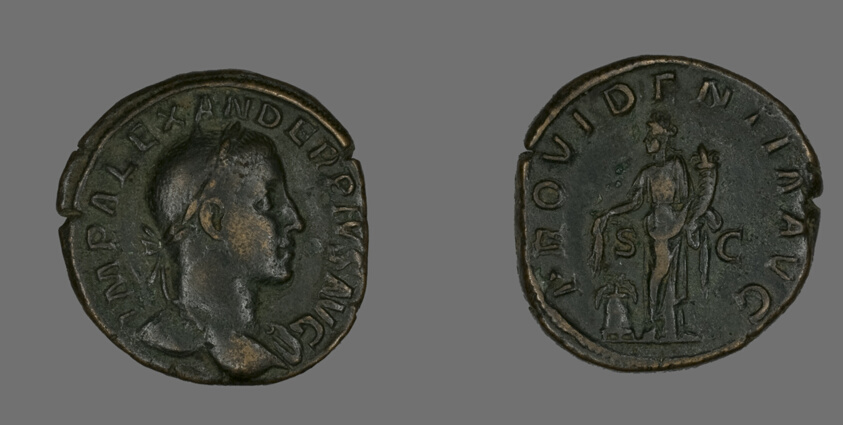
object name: Coin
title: Sestertius (Coin) Portraying Emperor Severus Alexander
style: roman (ancient, style or period)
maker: Roman, minted in Rome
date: 232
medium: Bronze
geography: Roman Empire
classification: coin; ancient art